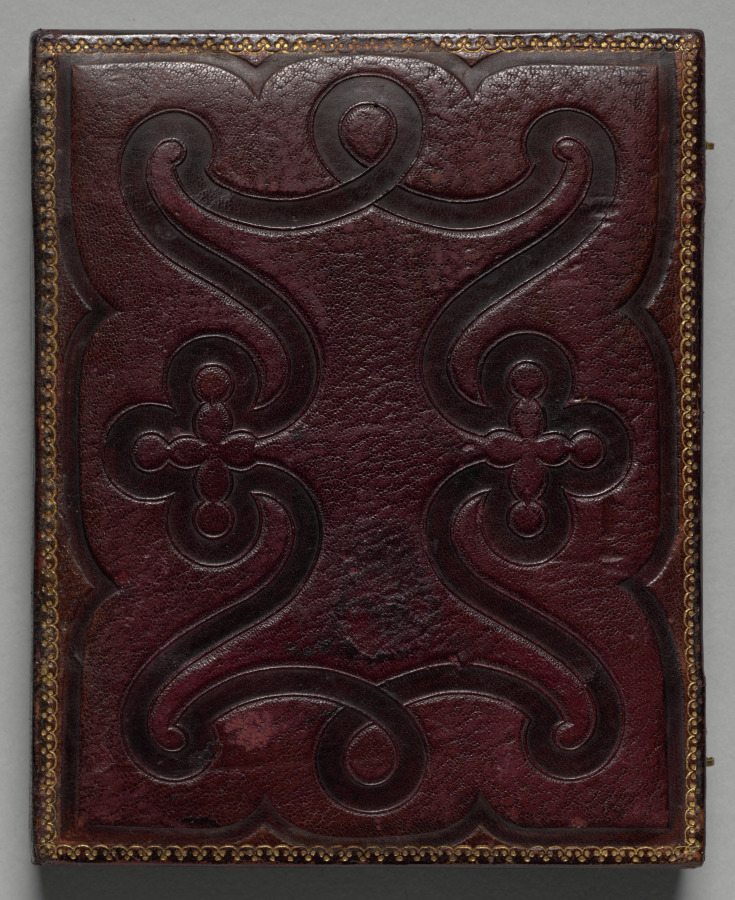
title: Secretary for a Lodge of a Temperance Organization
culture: America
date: c. 1854–55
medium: daguerreotype, half-plate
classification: Photograph